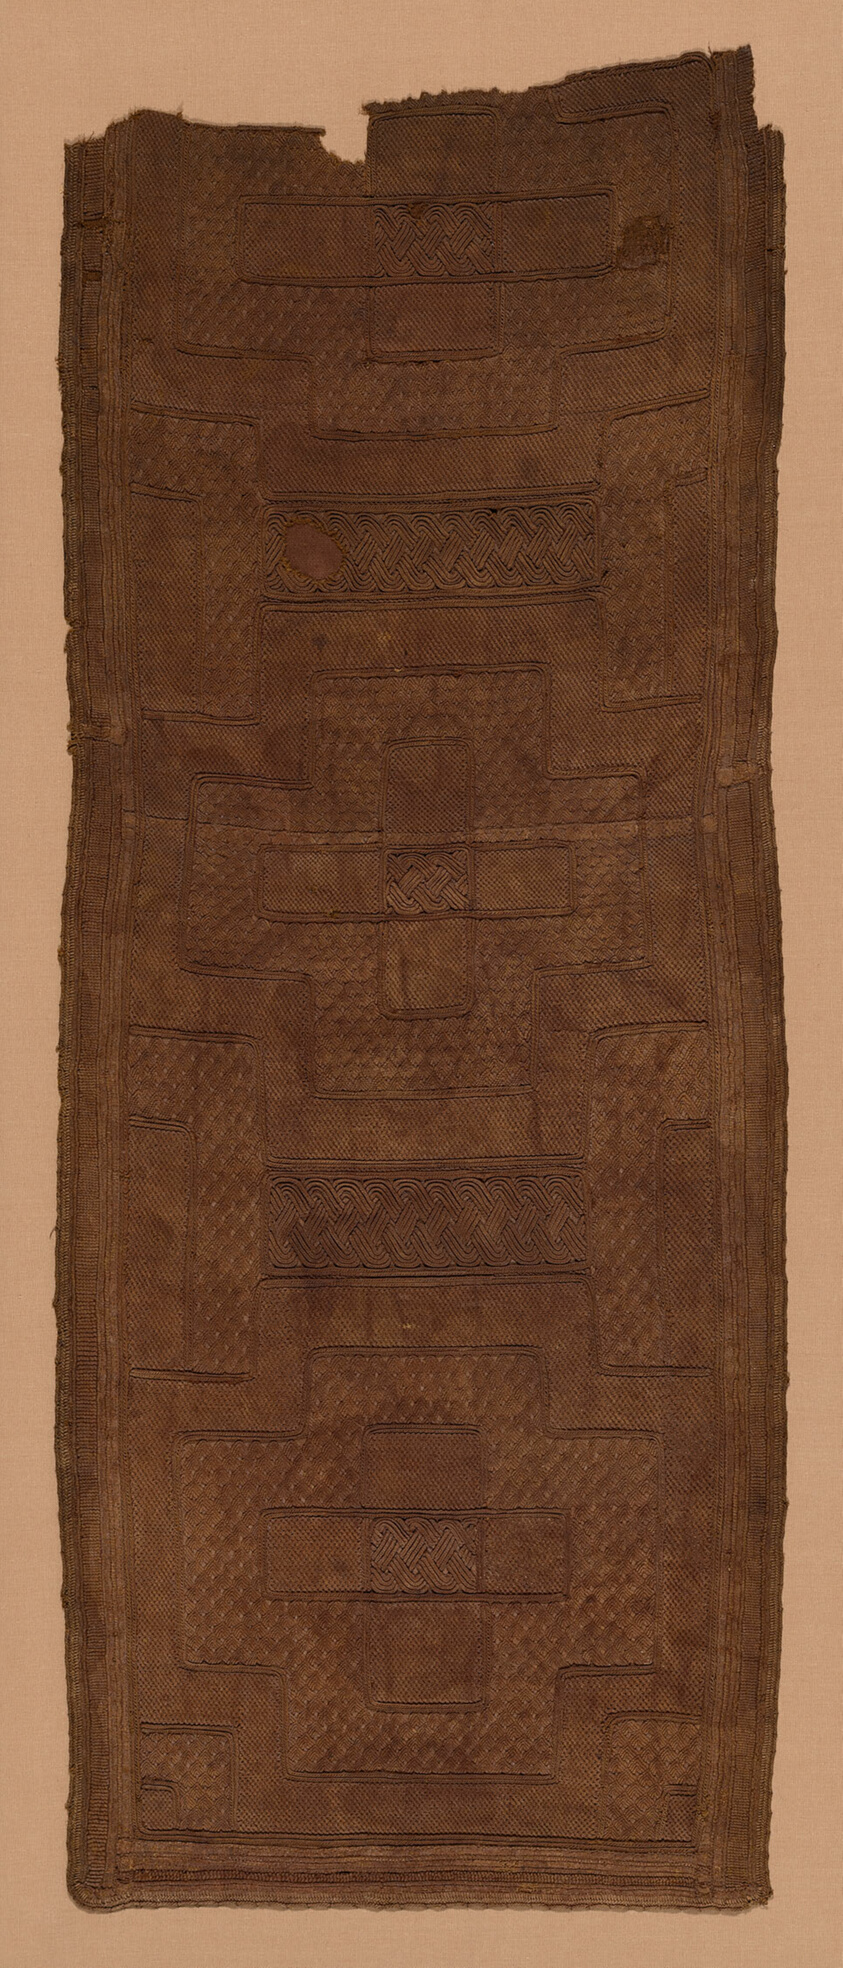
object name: Textile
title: Fragment from a Royal Overskirt (ncaka kot)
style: Arts of Africa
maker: Kuba; Kasai region, Democratic Republic of the Congo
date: Probably early 19th century and possibly as early as the 18th century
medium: Raffia, plain weave; embroidered with raffia in looped edging, pearl, Roman, stem, trammed overcast and a variation on twisted chain or lateral looping stitches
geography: Democratic Republic of the Congo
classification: textile; arts of Africa; needlework (visual works)